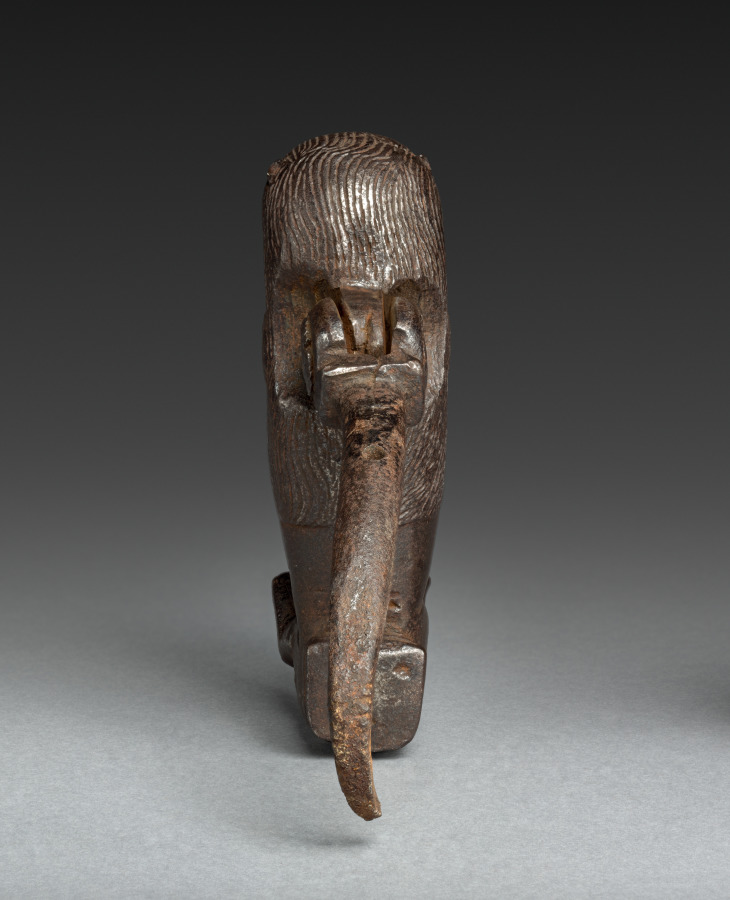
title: Doorknocker in the Form of a Lion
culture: Italy(?)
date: 1400s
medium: wrought iron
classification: Metalwork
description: Doorknockers such as this one were popular accessories for the homes of the wealthy during the Middle Ages. They are found in many different forms. The lion, symbolizing nobility, fortitude, and strength was highly favored.